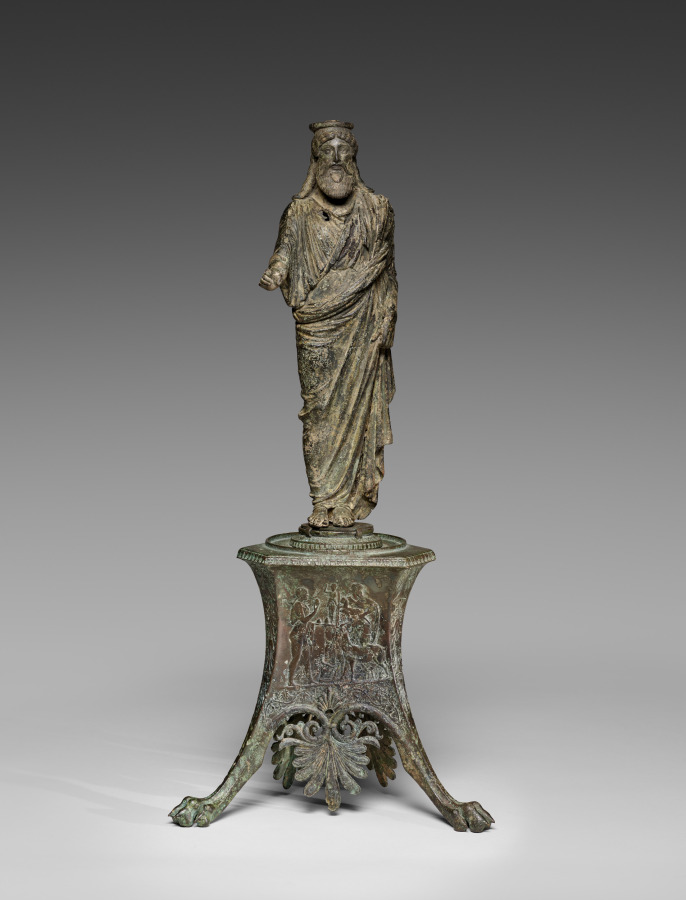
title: Tripod Base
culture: Italy, Roman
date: 100–1 BCE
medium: bronze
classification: Sculpture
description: This unusual tripod base features three clawed feet, an abundance of vegetal ornament, and three different figural scenes in low relief. Two seem to show sanctuary settings: first, a small Archaistic statue of Athena flanked by a woman with small offerings and a man holding a kid and leading two goats; and second, a small youthful male statue behind two beardless figures—perhaps Apollo, with a stag, and Dionysos, holding a thyrsos. The third scene shows Herakles, holding a club while leading a woman, maybe Auge or Alcestis. Although perhaps similarly eclectic in style, the base and the sculpture it now supports differ in their alloys and patinas.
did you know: This elaborate base may have originally supported an ornate lamp (not the statuette now displayed atop it).